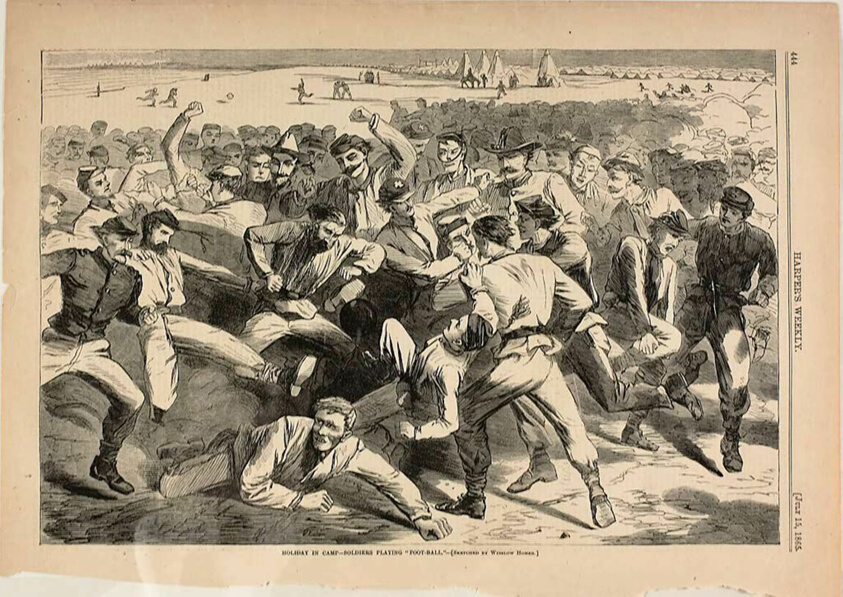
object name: Print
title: Holiday in Camp—Soldiers Playing "Foot-Ball"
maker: Winslow Homer (American, 1836-1910); published by Harper's Weekly (American, 1857-1916)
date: published July 15, 1865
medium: Wood engraving on paper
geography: United States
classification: wood engraving; print; prints and drawing